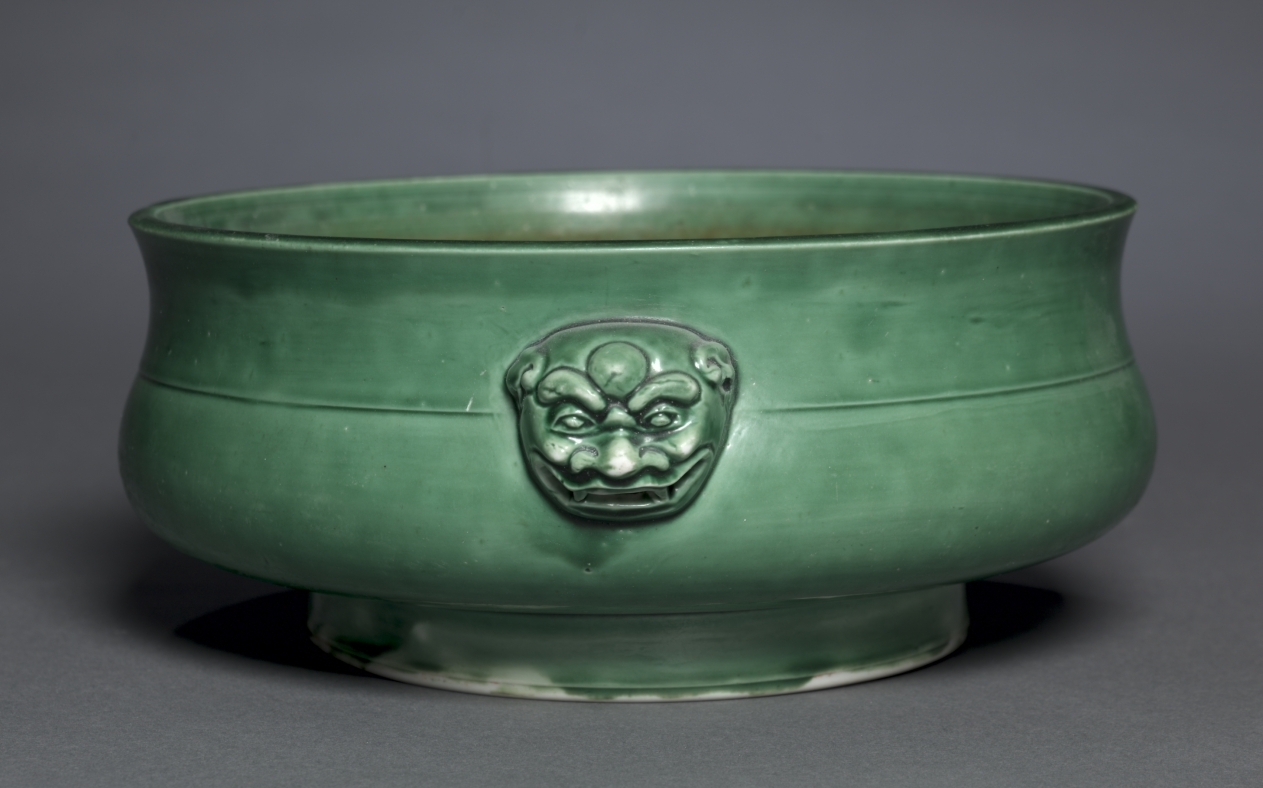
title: Bowl in Form of Archaic Gui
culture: China, Jiangxi province, Jingdezhen, Ming dynasty (1368-1644), Chongzhen reign (1628-44) or Qing dynasty, Shunzhi reign (1644-61), but Ming dynasty (1368-1644), Jiajing mark (1522-66)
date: 1628–61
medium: porcelain with camellia-leaf green glaze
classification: Ceramic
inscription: 大明嘉靖年製